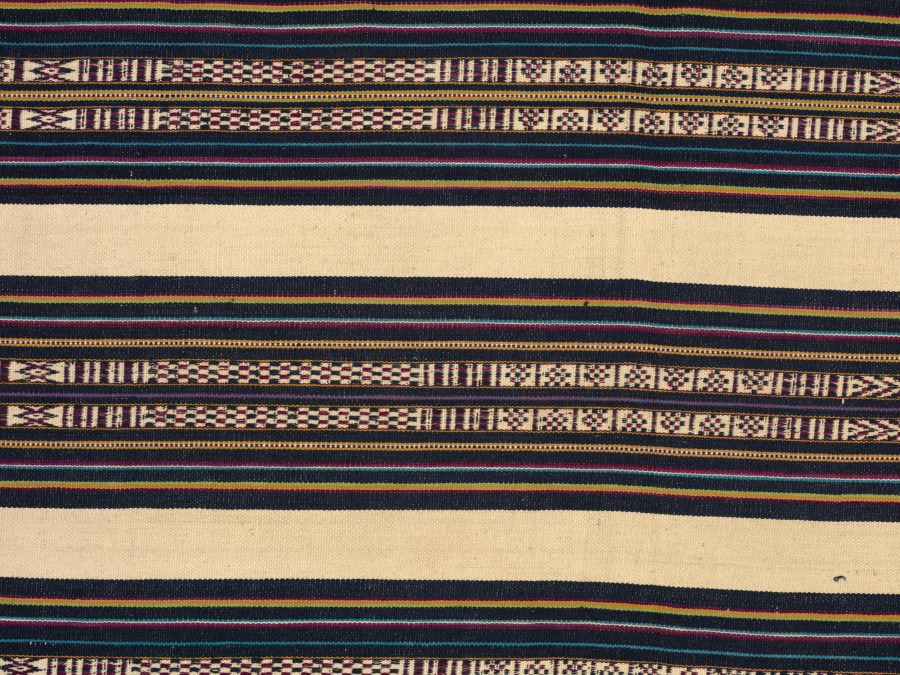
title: Textile Hanging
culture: Tibet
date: 1900–1915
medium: wool and cotton: warp faced plain weave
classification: Textile